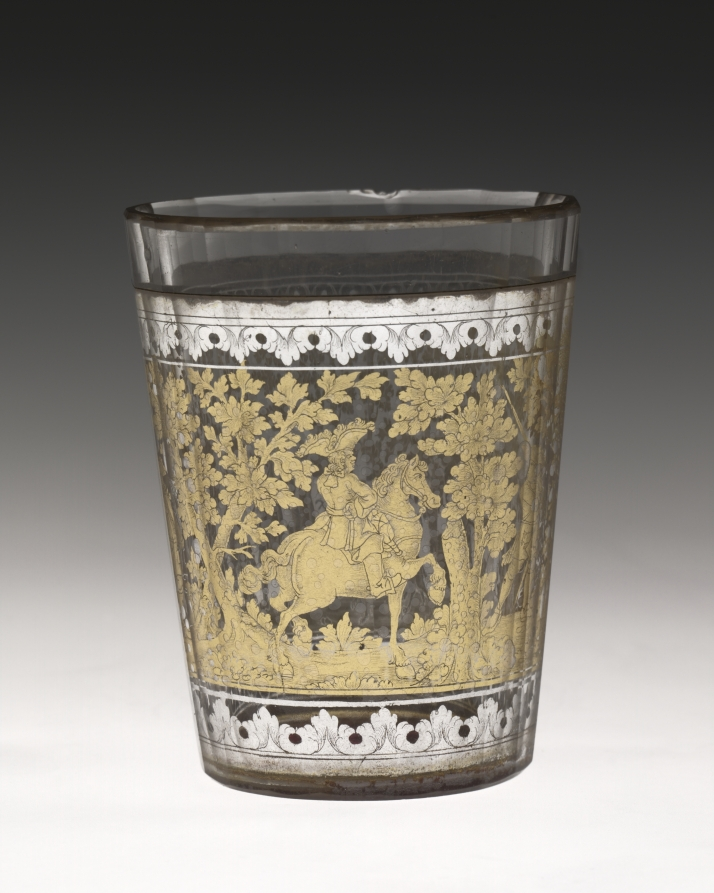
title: Tumbler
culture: Bohemia, 18th century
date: c. 1730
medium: zwischengoldglas (glass)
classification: Glass